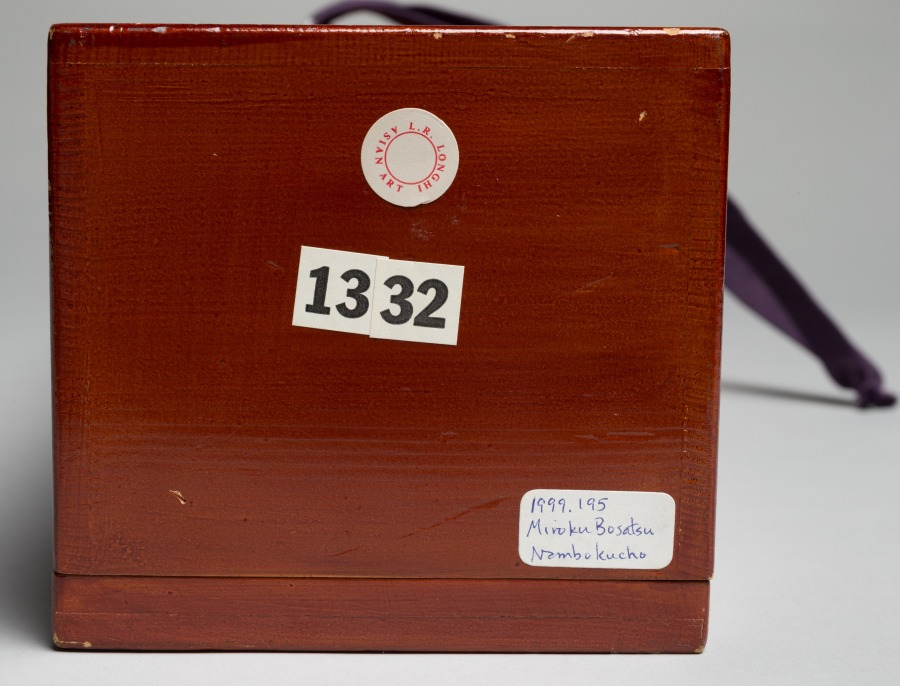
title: Miroku (Maitreya)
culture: Japan, Nanbokuchō period (1336–92)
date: 1300s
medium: Hanging scroll, ink, color, gold, and cut gold on silk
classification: Painting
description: In this image the figure of Miroku, Maitreya in Sanskrit, is richly adorned with gauzy fabrics, opulent jewels, and an intricate gold crown containing five seated Buddhas. Buddhist teachings say that Miroku will descend to Earth as a Buddha to restore Buddhist doctrine at the end of a long period of decline. Here he is represented as a bodhisattva, a being who has attained enlightenment but has chosen to postpone becoming a Buddha to help others reach enlightenment. Above the painting, three inscriptions present portions of a sacred text related to Miroku. A close look at the bodhisattva’s right side where fragile pigments have fallen away reveals writing on the back of the silk on which the image is painted— something its mounters never expected to be seen.